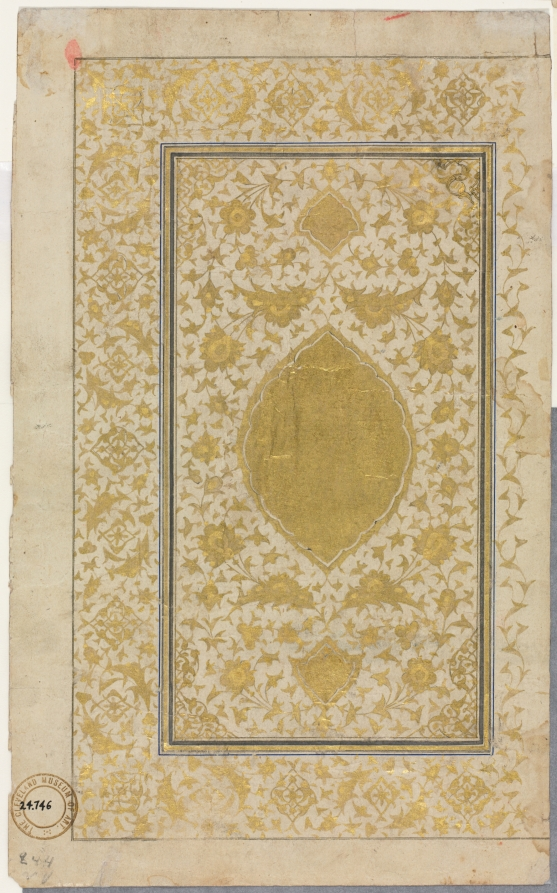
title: Qur'an Manuscript Folio (Recto); Illuminated Page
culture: Afghanistan, Herat, Safavid period (1501–1722)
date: 1500s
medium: ink, gold, and colors on paper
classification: Manuscript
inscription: Translation: Surah I: 1-7: In the Name of God, the Merciful, the Compassionate. Praise belongs to God, the Lord of all Being, the All merciful, the All-compassionate, the Master of the Day of Doom Thee only do we serve; to Thee alone do we pray for succour. Guide us in the straight path, the path of those whom Thou has blessed, not of those against whom Thou art wrathful, nor of those who are astray. Left folio (Surah II, 1-4) In the Name of God, the Merciful, the Compassionate. Alif Lam Mim That is the book, wherein is no doubt, a guidance to the godfearing who believe in the Unseen, and perform the prayer, and expend of that We have provided them; who believe in what has been sent down to thee and that had been sent down before thee, and have faith in the Hereafter; those are upon guidance from their Lord, those are the ones who prosper.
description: The Qur'an is the sacred book of Islam. In the view of orthodox Muslims, it is the literal word of God as revealed to the Prophet Muhammad (d. 632) in the Arabic language, and thus, recorded in the Arabic script. Because of its association with the divine word, Arabic calligraphy came to be a supreme art form in the Islamic world. As the quintessential symbol of the culture, it became a pervasive decorative element in Islamic art and architecture. Although secondary to calligraphy, a tradition of illumination—that is, ornamentation with colors and gold—developed to enhance the pages of the Qur'an. Because of the prestige associated with the book arts in the Islamic world, the decorative motifs employed by illuminators (scrolling vines, blossoms, lozenges, and cartouches) found their way into other art forms, for example, metalwork, textiles, and carpets.